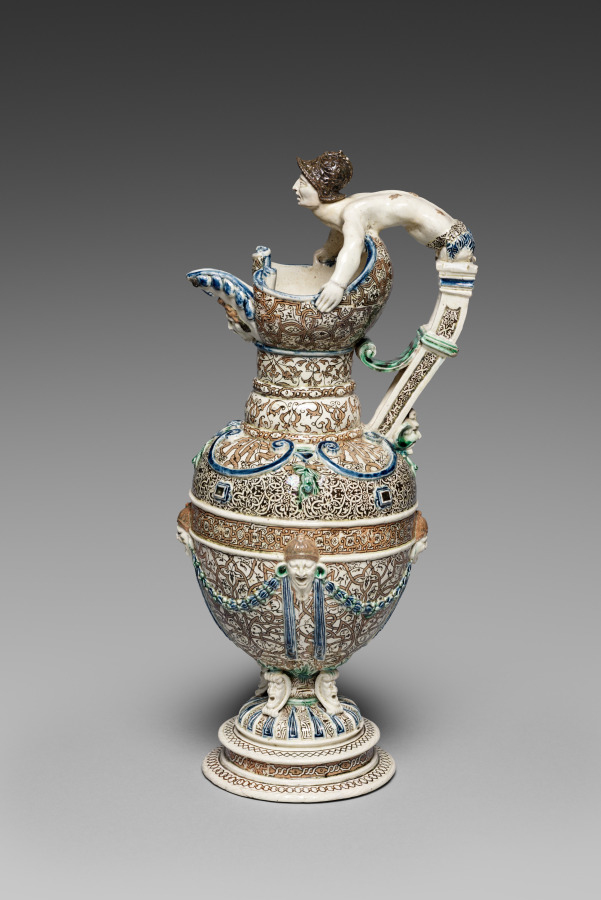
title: Ewer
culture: France, 16th century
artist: Saint-Porchaire (French)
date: c. 1540–67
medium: lead-glazed, white-paste earthenware with inlaid slip decoration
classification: Ceramic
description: An example of one of the most extravagant wares of this kind, this ewer is decorated with applied masks and frogs as well as a variety of stamped and inlaid designs. The shape and patterns reflect the metalwork of the time—the final period of this artistic pottery.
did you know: The green tree frog was one of the symbols of French King Henri II, indicating that this ewer may have either been made for the king or one of his courtiers.